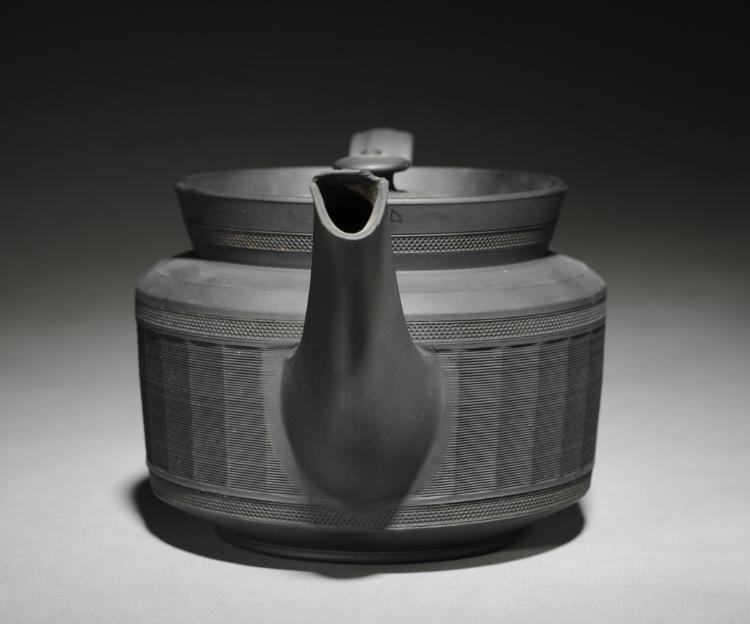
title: Teapot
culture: England, Staffordshire, 19th century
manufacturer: Davenport Pottery and Porcelain Factory (British)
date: 1800s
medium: black basalt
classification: Ceramic